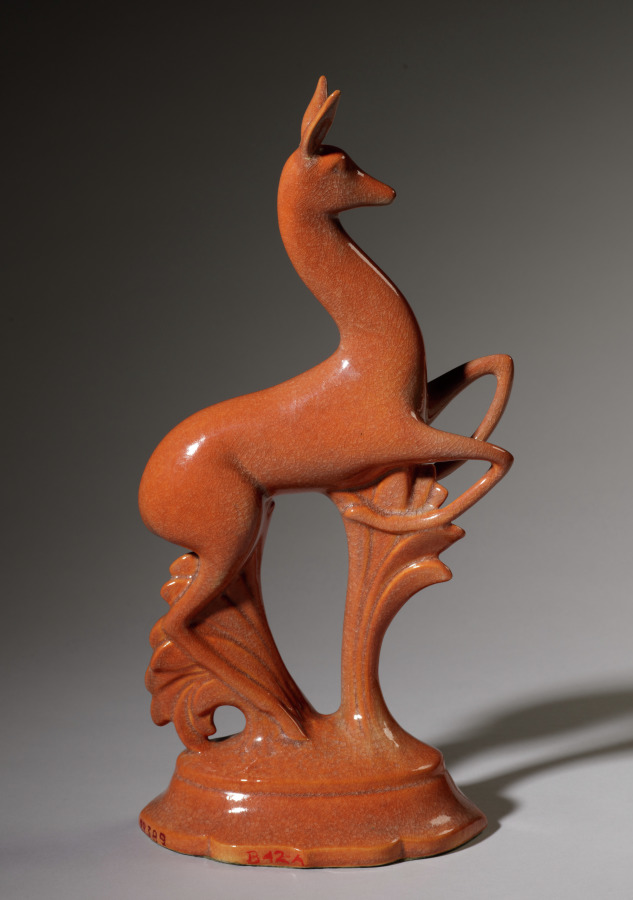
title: Fawn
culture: America, Ohio, Cleveland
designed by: Waylande Gregory (American, 1905–1971)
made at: Cowan Pottery Studio (America, Ohio, Rocky River, 1920–1931)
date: 1929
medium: earthenware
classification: Ceramic